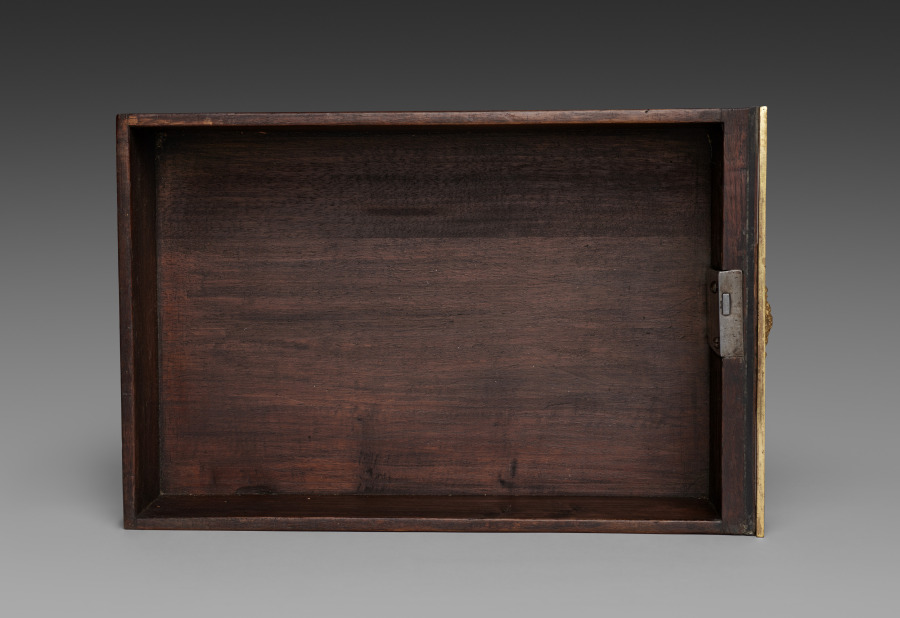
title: Side Drawer for Cabinet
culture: France, late 17th Century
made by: André-Charles Boulle (French, 1642–1732)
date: c. 1690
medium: ebony, marquetry in metal and tortoise shell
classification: Furniture and woodwork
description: Appointed cabinetmaker to King Louis XIV in 1672, André-Charles Boulle became a master of furniture making in France during the late 1600s until his death in 1732. Known primarily for his use of marquetry, in which metal patterns are inlaid into tortoiseshell then applied within the veneered surface of the furniture, Boulle established a level of quality and craftsmanship few others could achieve. As a result, his work found favor at the royal court and among other aristocrats and diplomats eager to impress the king. The inclusion of a medallion depicting Louis XIV within the bronze decoration of this chest would have identified the owner with the royal court. Often exhibiting stout architectural proportions with elegant groups of inlaid motifs such as the parrot on the central panel of this chest, Boulle’s designs are an example of the intellectual fashion for contrasting ideas, materials, and motifs.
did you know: Originally designed to sit atop an elaborate tall stand, this chest was likely altered in the late 1700s to reduce its scale and height.